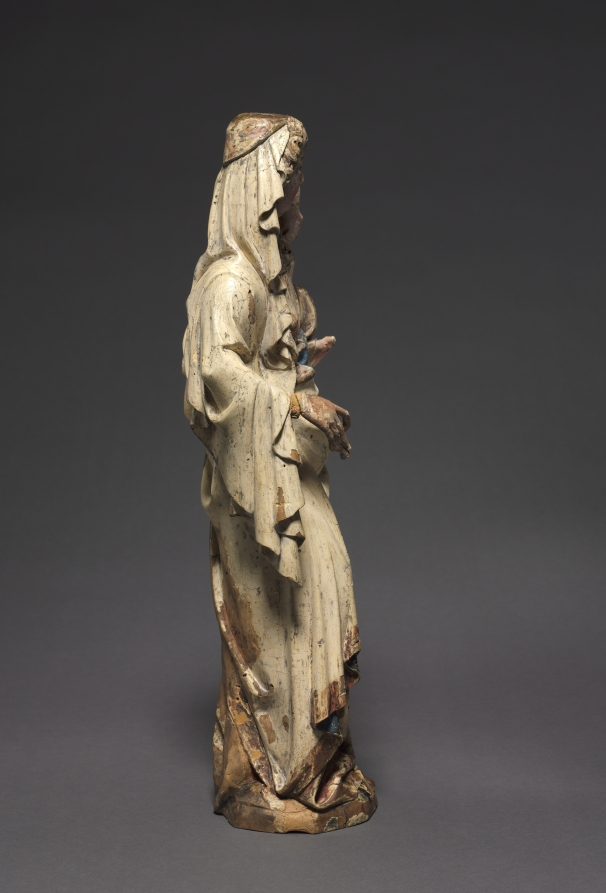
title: Virgin and Child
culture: Austria, Diocese of Passau, 14th century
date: c. 1370–1380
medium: painted lindenwood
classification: Sculpture